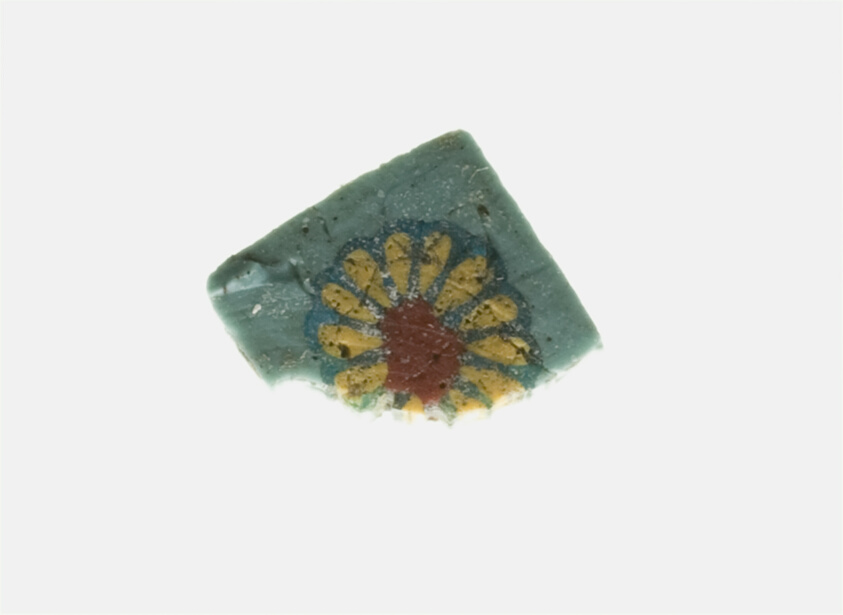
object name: Decorative Arts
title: Fragment of an Inlay Depicting a Rosette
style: roman (ancient, style or period), ancient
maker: Roman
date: 1st century BCE–1st century CE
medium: Glass, mosaic glass technique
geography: Italy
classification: glass; inlay; ancient art; decorative arts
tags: decoration, flowers